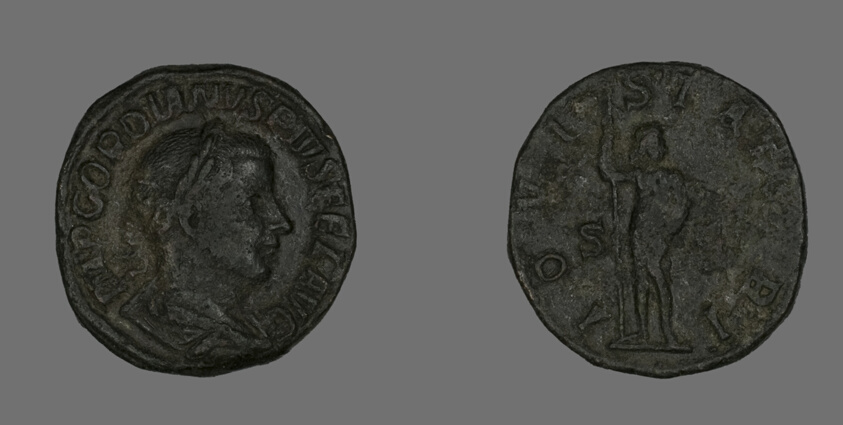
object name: Coin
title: Sestertius (Coin) Portraying Emperor Gordianus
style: roman (ancient, style or period), ancient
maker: Roman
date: 238-244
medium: Bronze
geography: Roman Empire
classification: coin; ancient art